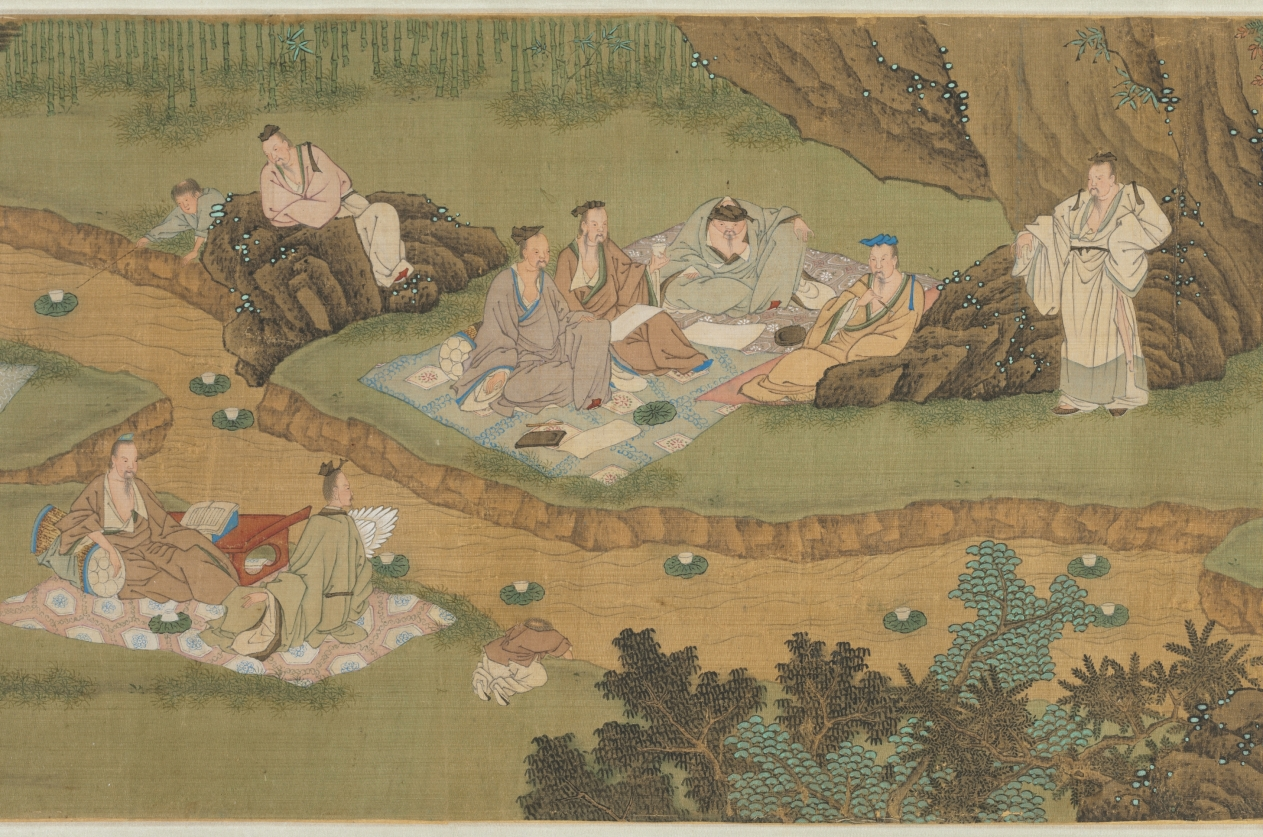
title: Purification at the Orchid Pavilion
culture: China, Qing dynasty (1644-1911)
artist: Fan Yi (Chinese, c. 1615–before 1688)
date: 1671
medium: Handscroll; ink and color on silk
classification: Painting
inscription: Artist's inscription, signature, and 2 seals: Painted by Fan Yi of Zhongfu during the second month of winter of the xinhai year [1671]. [2 seals] Fan Yi zhi yin, Zi yu yi.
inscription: Title on the frontispiece by Monk Yueshan (1629-1709).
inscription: 3 colophons and 13 additional seals: 1 colophon, dated 1707, and 6 seals of Yueshan; 2 colophons and 3 seals of Wong Kwan-Shut (Huang Junshi) 黃君實 (b. 1934); 2 seals of Fu Shen 傅 申 (b. 1937); 2 seals of Tessai Tomioka 富岡鐵齋 (1836-1924).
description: By the 1600s, the historic gathering at Lanting, Zhejiang province, in 353 CE was a common theme in Chinese painting. Originally based on a composition attributed to Li Gonglin (1049– 1106), now lost, Wu school artists revived the theme. Fan Yi, the brother of the artist Fan Qi from Nanjing, used delicate brushwork and luminous colors to depict the spring gathering.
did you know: The gathering’s host is in the Orchid Pavilion at the end of the scroll, representing an episode known as “Wang Xizhi Watching the Geese 王羲之觀鵝圖.”